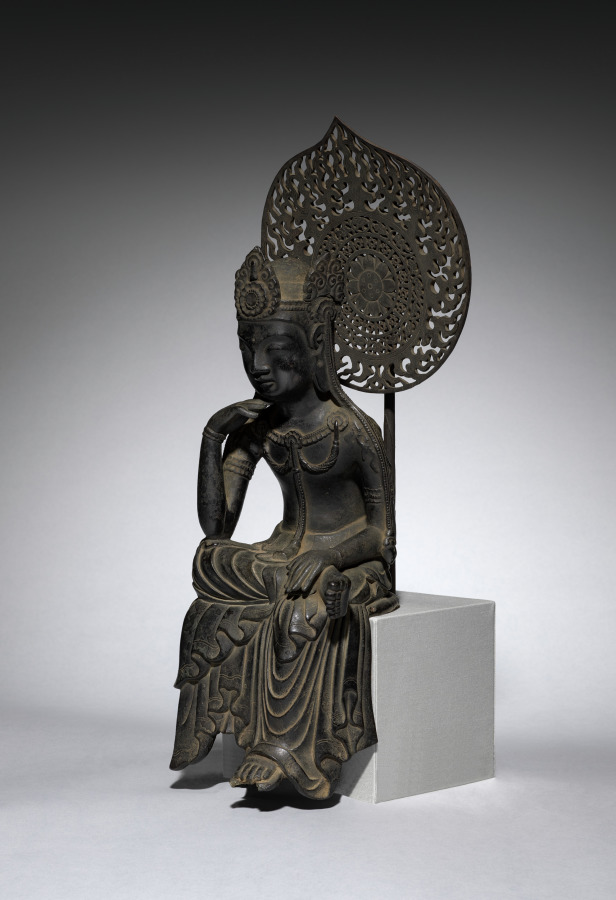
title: Buddha of the Future (Miroku Bosatsu)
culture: Japan, Asuka period (538–710)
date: late 600s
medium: cast bronze, incised, with traces of gilding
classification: Sculpture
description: Buddhism was introduced to Japan in the sixth century. For early Japanese devotees, Buddhism offered the promise of salvation through faith in the Buddha of the Future, who would appear at the end of the world. The concept of eternal salvation held particular resonance with the Japanese aristocracy, who became the staunchest supporters of this new faith. Small sculptures like this one, with its gentle grace and powerful presence, were popular devotional objects.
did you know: The Sanskrit name of this being, Maitreya, derives from the Sanskrit word for friend, mita.